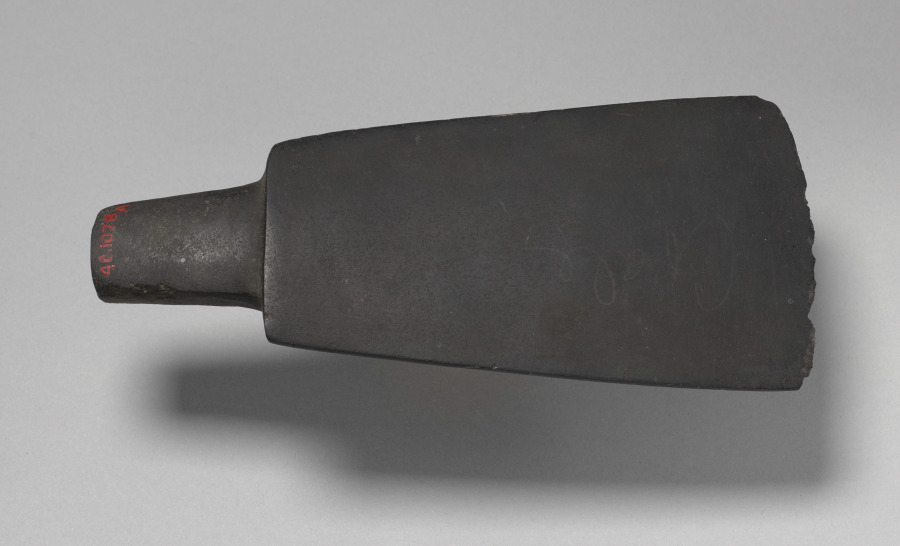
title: Blade from a Ceremonial Adze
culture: Polynesia, Mangaia, Cook Islands, 19th century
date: 1800s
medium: stone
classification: Sculpture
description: Before European contact, Polynesian carving tools were fashioned from bone, shell, stone, or teeth. The introduction of iron tools facilitated carving, while the demand of European sailors and missionaries for souvenirs provided a new market for craft products. Ceremonial adzes probably represented gods or spirits. The wooden handle of this example is carved with the characteristic K motif. The stone adze blade is lashed to the handle with finely plaited sennit fiber cord. According to legend, the distinctive pattern formed by the sennit lashing was taught to Mangaian craftsman by the gods.